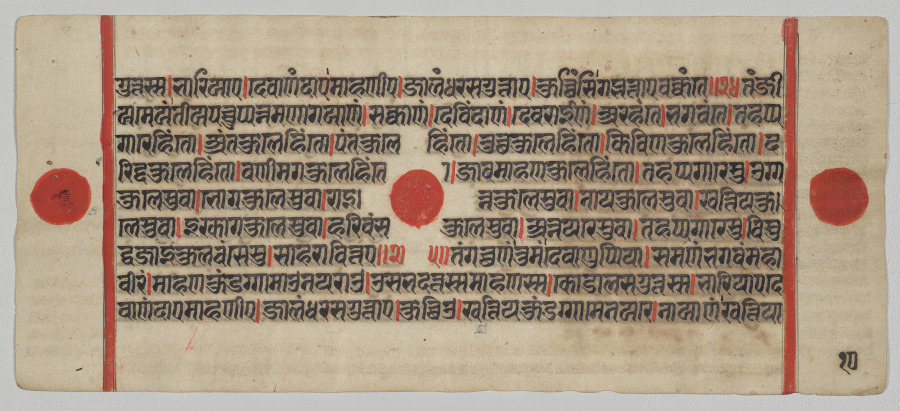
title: Text, Folio 10 (verso), from a Kalpa-sutra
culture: Western India, Gujarat, last quarter of the 15th century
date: c. 1475–1500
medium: Gum tempera, ink, and gold on paper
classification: Painting